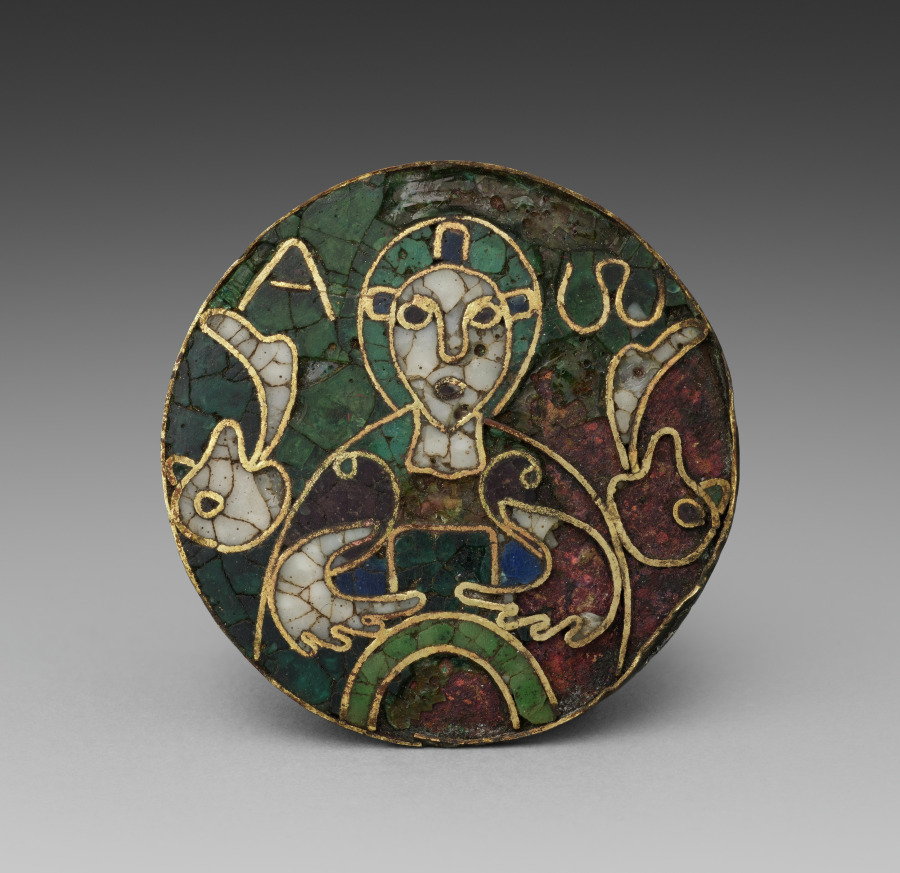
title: Medallion with the Bust of Christ ("The Cumberland Medallion"), from the Guelph Treasure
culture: Germany, Weserraum, Migration period, late 8th century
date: late 700s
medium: cloisonné enamel and gold on copper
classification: Enamel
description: This medallion may have originally served as a sacerdotal brooch and is the earliest object from the Guelph Treasure, the ecclesiastical treasure of Germany’s Braunschweig (Brunswick) Cathedral.